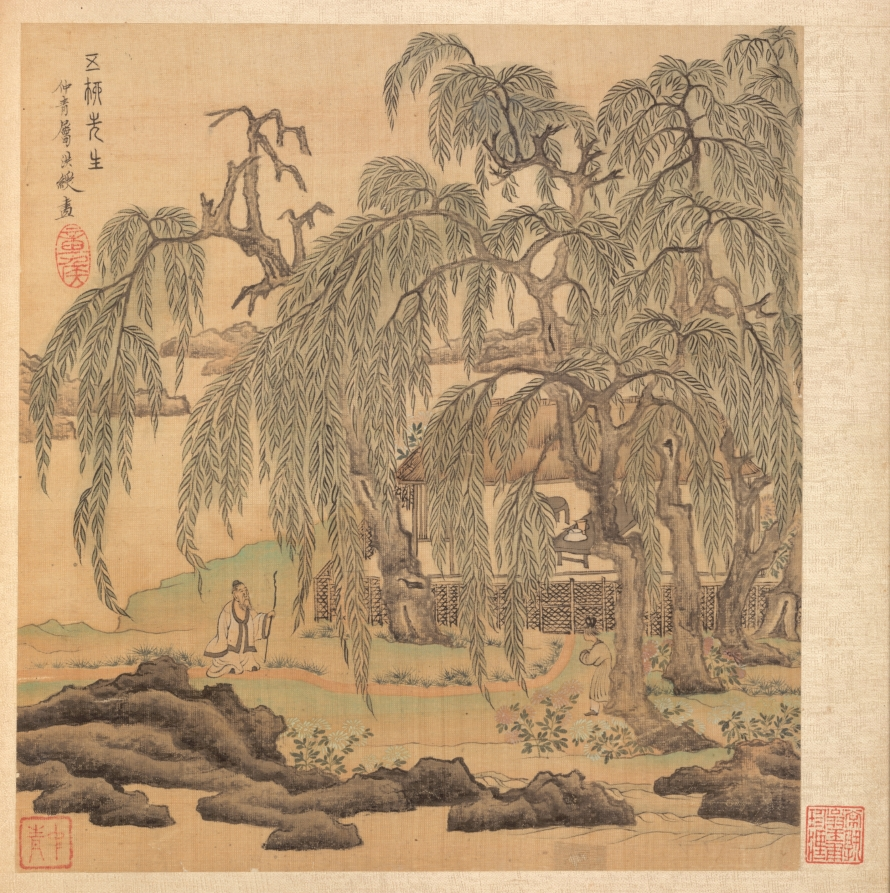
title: Paintings after Ancient Masters: Mr. Five Willows (Wuliu), Tao Yuanming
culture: China, Ming dynasty (1368–1644)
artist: Chen Hongshou (Chinese, 1598/99–1652)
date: 1598–1652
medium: album leaf, ink and color on silk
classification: Painting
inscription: 五柳先生仲青屬洪綬畫. [印] 章侯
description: The twenty paintings in this double-album by Chen Hongshou include landscapes, figures, and flowers. It also has one leaf featuring a woman, an often-used subject not found in the other albums from the latter part of his career. His late works are wonderful summations of Chen's peculiar and quirky art--archaistic, hyper-refined--but without accompanying shallowness or sentimentality. His figures and landscapes in the late albums are miniaturized, not unlike the small Chinese gardens, or the carefully selected small table rocks or old roots used for contemplation to see the world in miniature. This loss of scale is quite deliberate and reflects the psychological situation of a depressed class like the Ming loyalist officials and scholars, deprived of their integrity and honor, and forced to lead a diminished and restricted existence.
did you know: This painting is dominated by a huge willow tree, alluding to poet Tao Yuanming, who used the name "Master of the Five Willows."